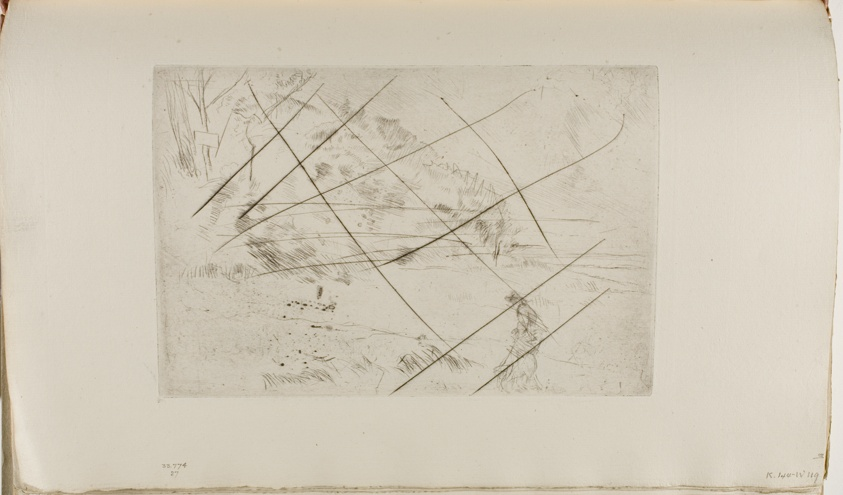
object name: Print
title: Speke Shore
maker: James McNeill Whistler (American, 1834-1903)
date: 1875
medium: Drypoint with foul biting, with drypoint cancellation, in black ink on ivory laid paper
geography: United States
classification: drypoint; prints and drawing; book; foul biting; print; paper